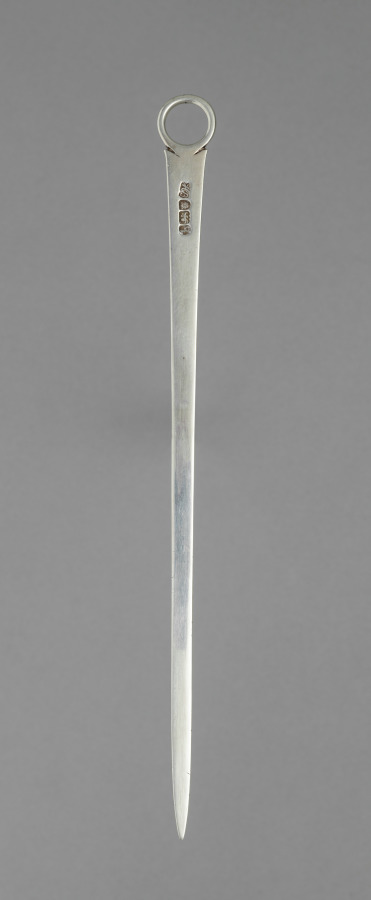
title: Skewer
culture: England, 18th century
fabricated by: Hester Bateman (British, 1709–1794)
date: 1783–1784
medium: silver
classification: Silver